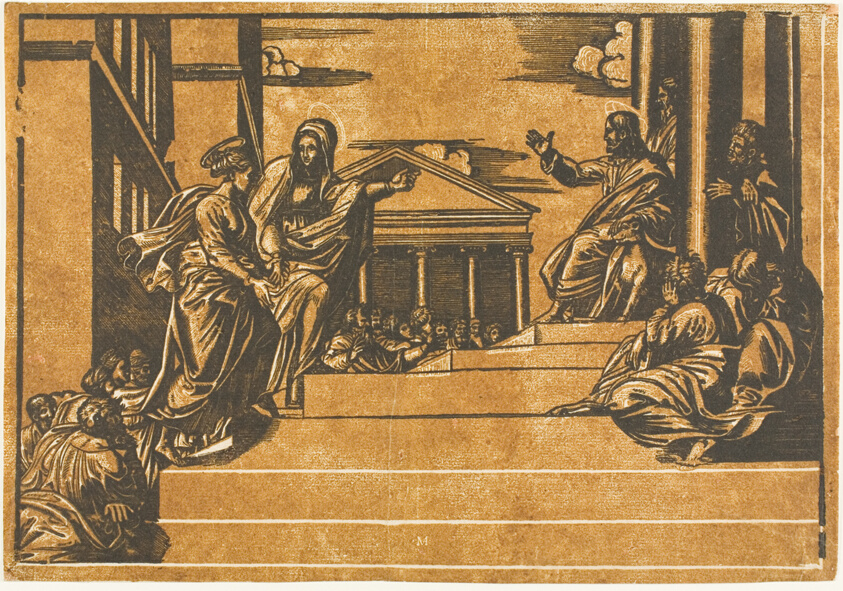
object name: Print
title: Martha and Magdalen Ascending the Steps of the Temple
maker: Georg Matheus (German, active 1554-1572); after Marcantonio Raimondi (Italian, c. 1480-1534), after Raphael (Italian, 1483-1520)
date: c. 1550-70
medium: Chiaroscuro woodcut from two blocks printed in ochre and black on ivory laid paper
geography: Germany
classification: woodcut; print; prints and drawing